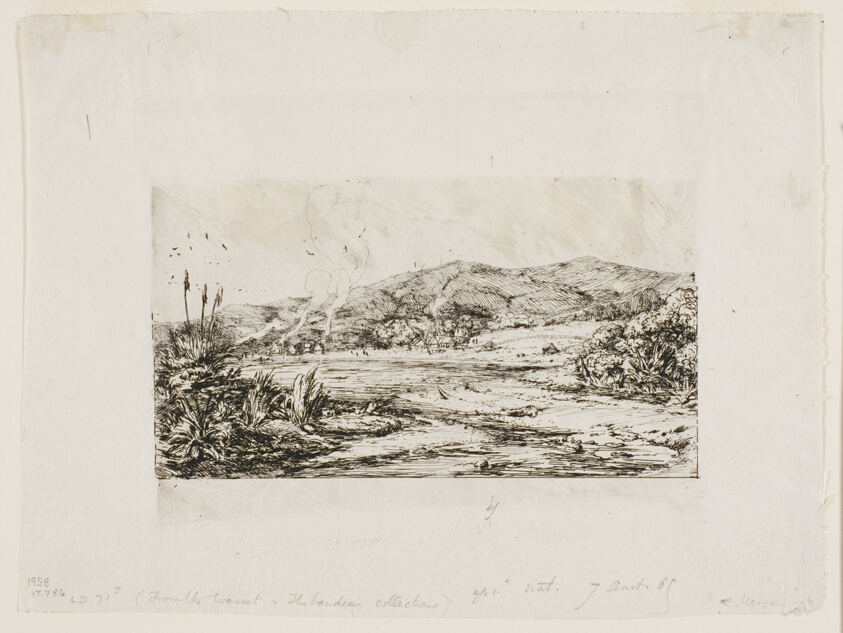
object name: Print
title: The Little French Colony at Akaroa, 1845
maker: Charles Meryon (French, 1821-1868)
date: 1865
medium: Etching with burnishing on grayish-ivory China paper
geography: France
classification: etching; print; prints and drawing